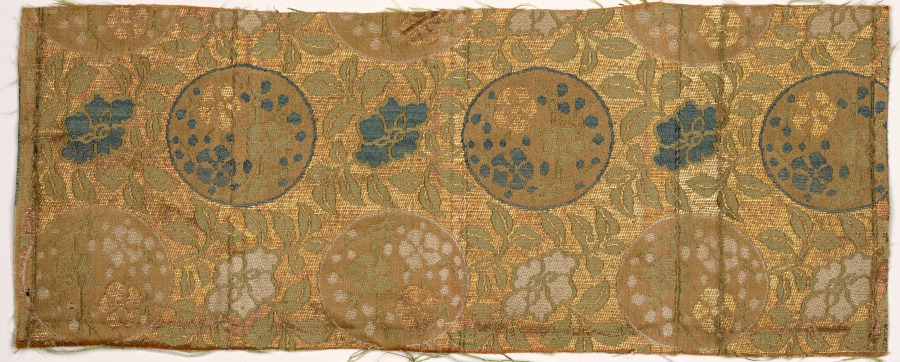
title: Textile Fragment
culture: Japan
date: 1800s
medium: silk, metallic thread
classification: Textile